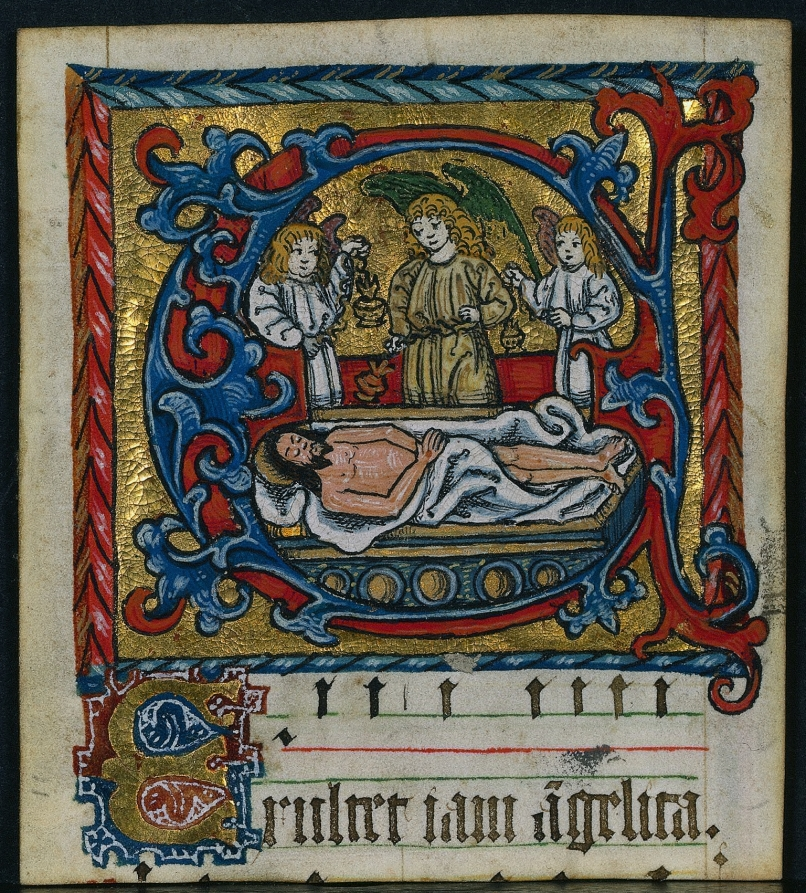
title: Three Cuttings from a Missal: Initial E with the Angels of the Entombment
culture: Germany, Franconia or Saxony (?) or Silesia (?), 15th century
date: c. 1470–1500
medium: ink, tempera and gold on vellum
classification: Manuscript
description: These three cuttings are illuminated in a style that is somewhat provincial and difficult to localize. The figures relate to late 15th-century German woodcut illustration, but also vaguely recall Franconian sculpture and Saxon painting. The figures are simply, though charmingly, sketched in heavy black ink with little attention to finesse of line or detail. The palette is confined to dark hues of red, blue, and ochre with flesh tones either left white or colored pink. The style hints at an origin in Franconia, Saxony, or Silesia. The initial E includes a form of musical notation called Hufnagalshrift or "horseshoe nail writing" because it resembles the nails used to attached horseshoes. Hufnagalshrift appears almost exclusively in manuscripts produced in Germanic Central Europe. The use of different colored lines in the musical stave is a known feature of Saxony. The text Exultet iam angelica (Rejoice now angel) begins the prayer used only on Holy Saturday during the Easter Vigil. It was sung by the priest at Mass to a very special and ancient melody.